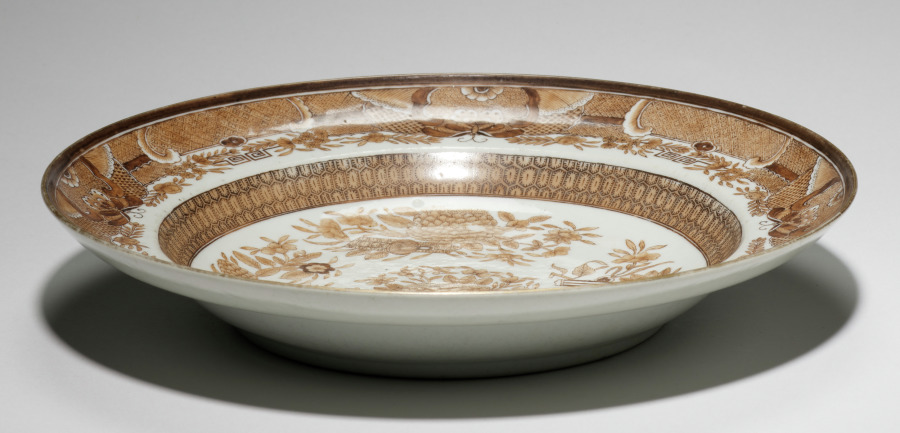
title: Soup Plate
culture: China, Chinese Export -- English or American Market (probably), 19th century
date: c. 1800–1825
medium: porcelain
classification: Ceramic